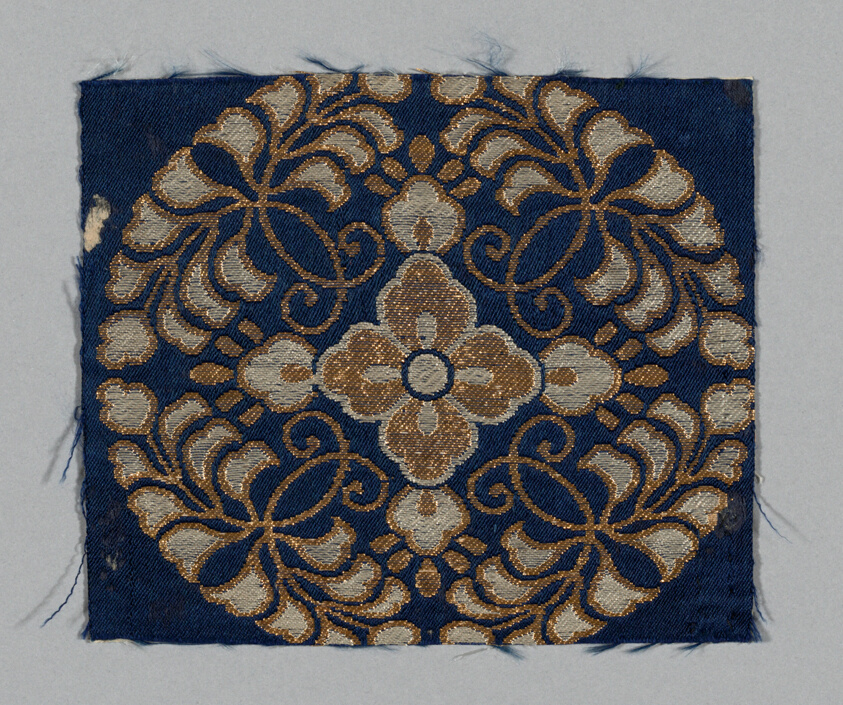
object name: Textile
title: Fragment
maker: Japan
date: late Edo period (1789–1868)/ Meiji period (1868–1912), 19th century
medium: Silk and gold-leaf-over lacquered-paper-strip, satin weave with supplementary pattern wefts bound by secondary binding warps in twill interlacings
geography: Japan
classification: textile; weaving